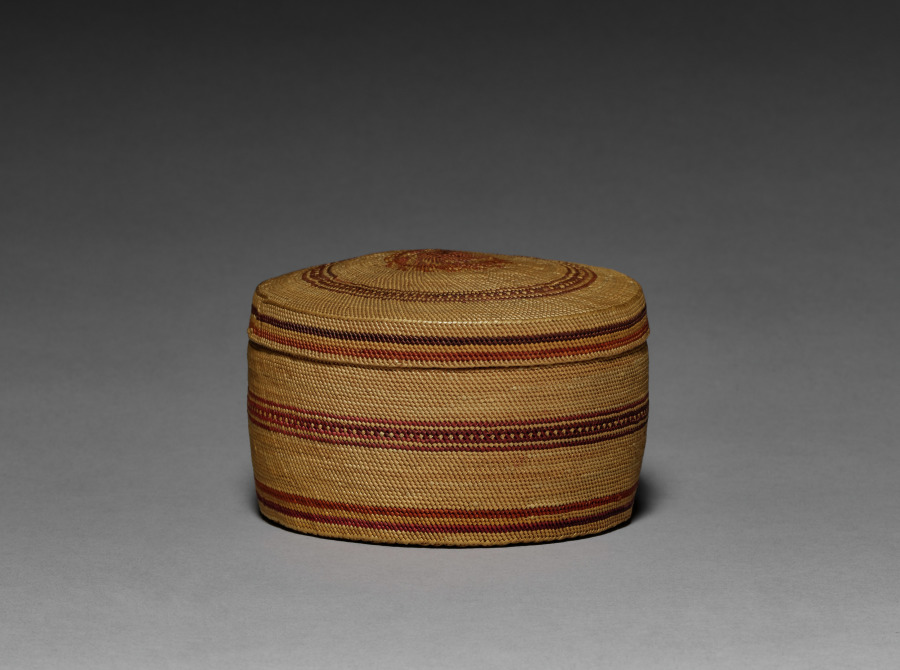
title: Lidded Bowl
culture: Northwest Coast, Makah, late 19th century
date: c 1900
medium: Cedar bark, deer grass; wrapped twining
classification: Basketry